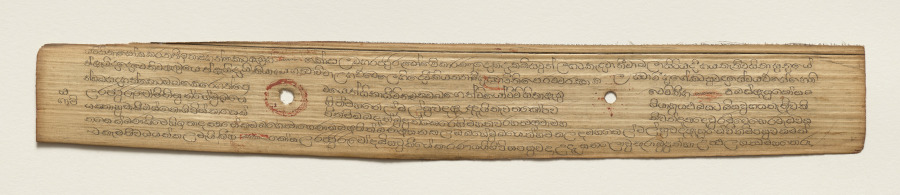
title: Leaf from a Buddhist Manuscript (recto)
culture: Sri Lanka, Singhalese, Late 17th century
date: c. 1700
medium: fiber paper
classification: Manuscript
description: Palm leaf material is still used for manuscripts in Sri Lanka. The palm leaves are prepared first by boiling them, drying them in the sun, and then rubbing them with oils. Scribes then use a metal stylus to incise the text. Then charcoal powder is wiped across the pages, filling in only the inscribed lines.